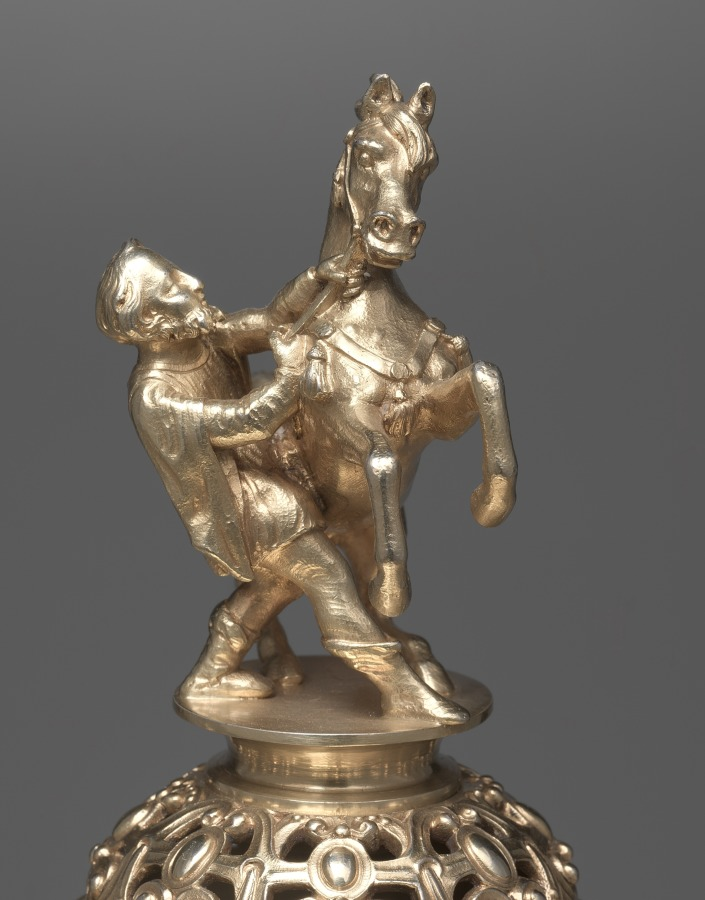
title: Centerpiece (lid)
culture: France, 19th century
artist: Charles-Nicolas Odiot (French, 1826–1868)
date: 1838–1848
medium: silver gilt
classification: Metalwork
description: Made for Louis Philippe (1773-1850), King of France 1830-48.